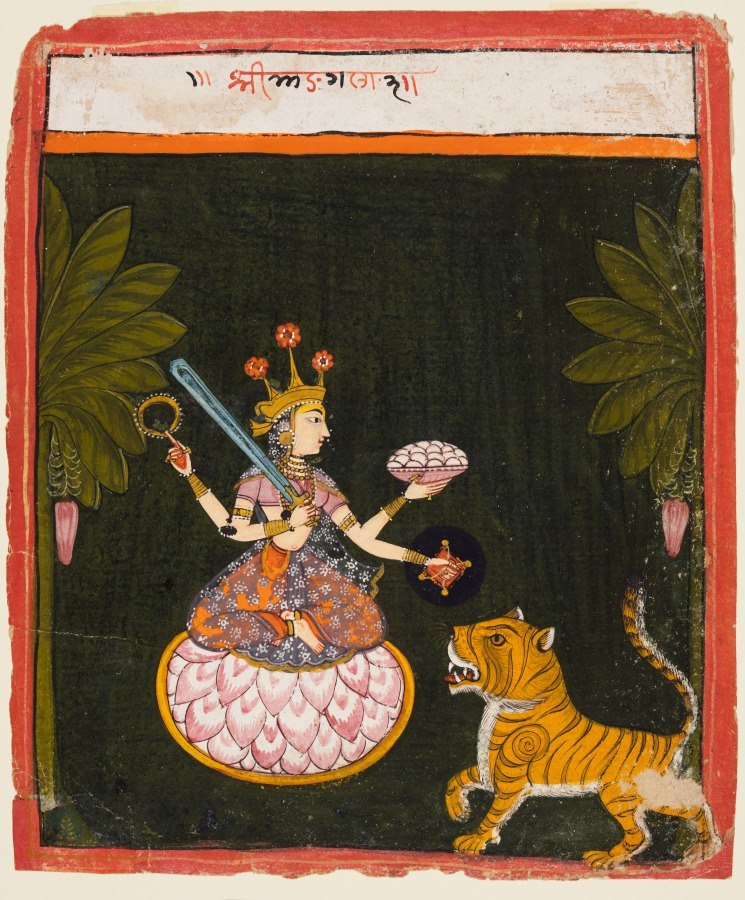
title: Goddess Mangala, from a Devi Series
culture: India, Rajasthan, Ajmer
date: c. 1660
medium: Gum tempera on paper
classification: Painting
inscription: śrī maṃglā 3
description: The four-armed goddess sits on an open lotus against a dark green background. She holds a discus, sword, bowl of cakes, and a shield. Banana trees flank her, and her tiger mount stands beneath. The subject in the painting appears to be a regional form of the Devi, as the name “Mangala” does not appear in major Hindu scriptures.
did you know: Banana flowers hang pendant and are bright pink.